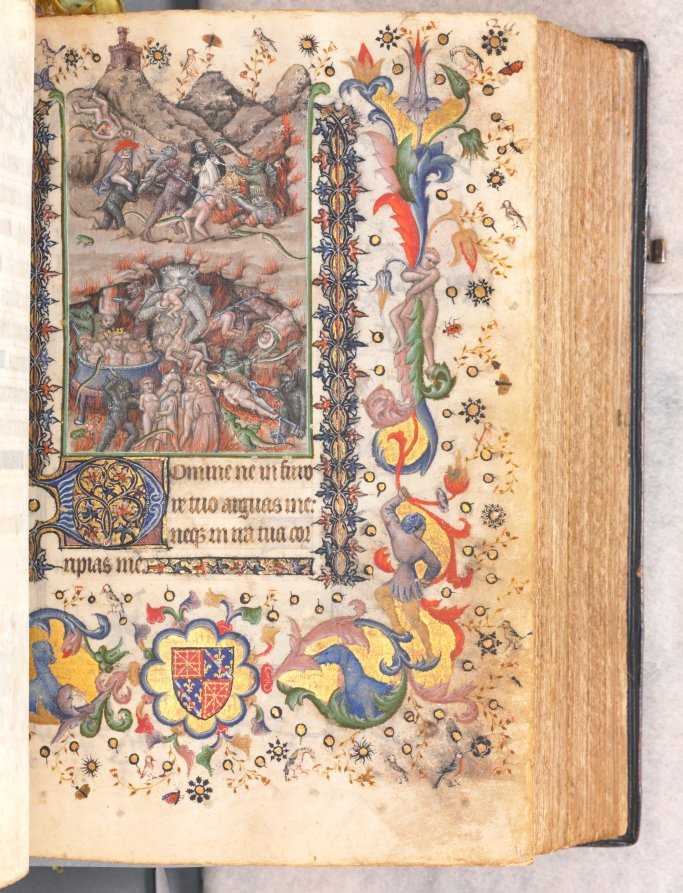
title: Hours of Charles the Noble, King of Navarre (1361-1425): fol. 106r, Last Judgment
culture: France, Paris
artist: Master of the Brussels Initials and Associates (French)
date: c. 1405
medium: ink, tempera, and gold on vellum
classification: Bound Volume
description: This precious volume was obviously highly prized by its owner, the French-born King of Navarre, who had his coat of arms painted on no less than twenty folios. Rather than directly commissioning this manuscript from a specific workshop, it seems that Charles the Noble acquired his book of hours -- perhaps ready-made for the luxury market -- while on a trip to Paris in 1404-05. A collaborative effort, six painting styles are evidenced within the pages of this codex, those of two Italians, two Frenchmen, and two Netherlanders. The painter who was responsible for the planning and decoration of the book, and who produced seventeen of the large miniatures, was a Bolognese artist known as the Master of the Brussels Initials. His principal assistant, responsible for most of the borders, was a Florentine who signed his name "Zecho" da Firenze on folio 208 verso.